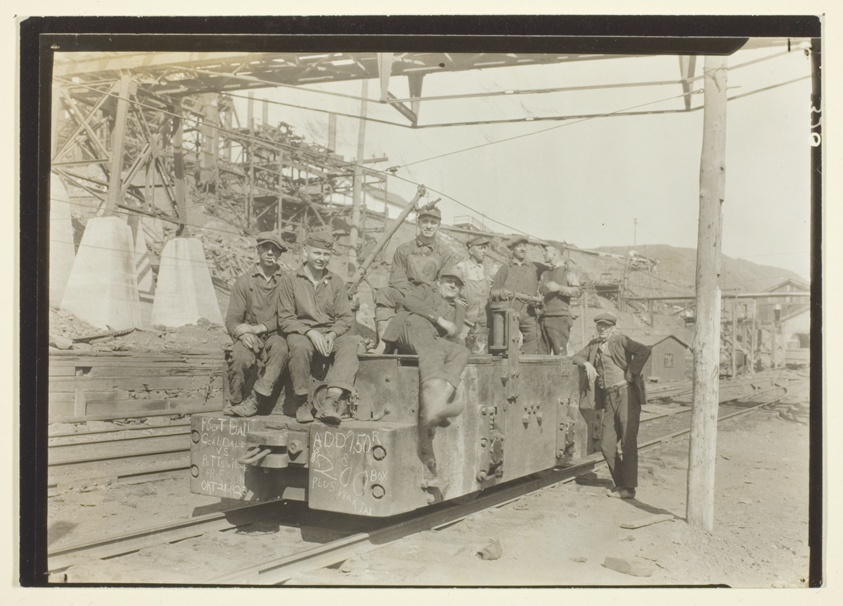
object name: Photograph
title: Untitled (A Fairly Modern Coal Mine, Electrified, In East Pennsylvania)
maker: Lewis Wickes Hine (American, 1874–1940)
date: 1920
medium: Gelatin silver print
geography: United States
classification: gelatin silver (developing-out-paper) pr; photographic process; photography; photograph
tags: Collected by Hugh Edwards, documentary